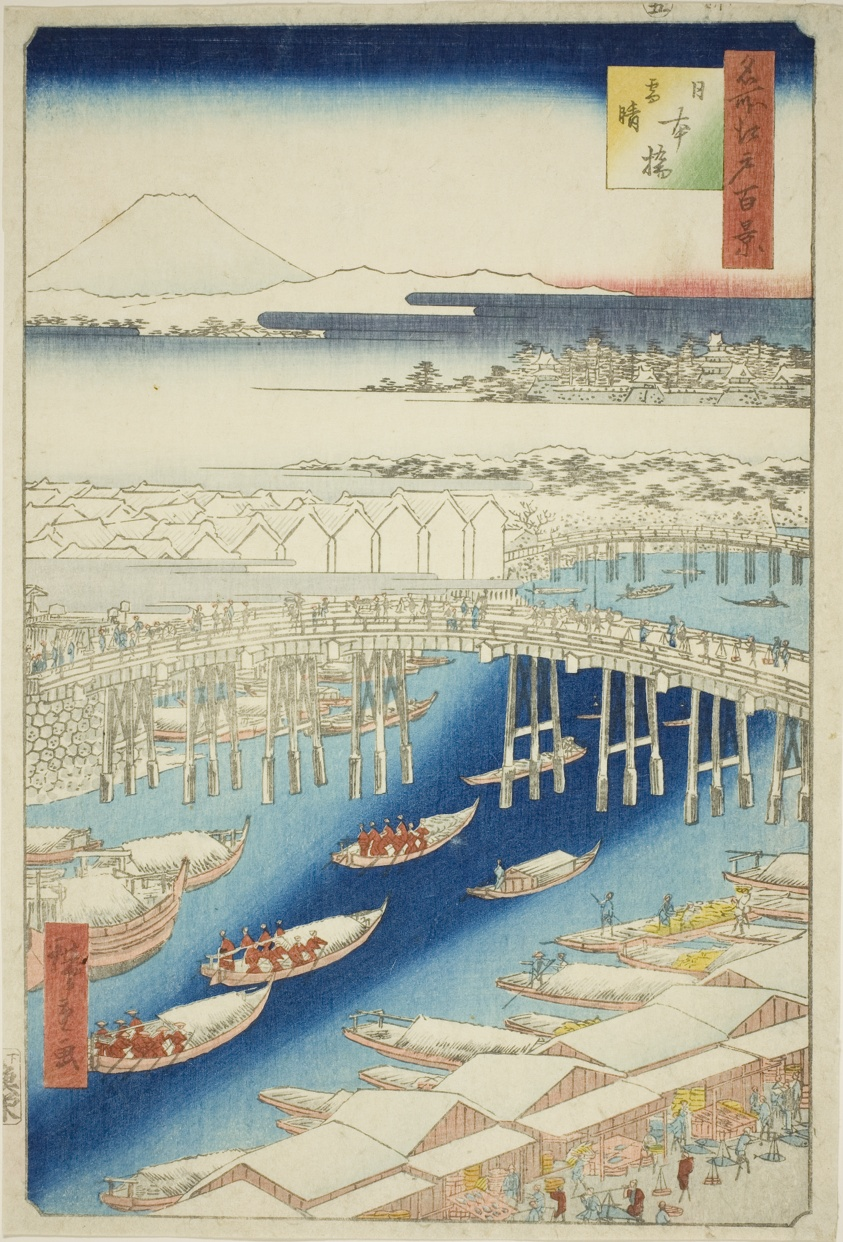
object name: Print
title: Clear Weather After Snow at Nihon Bridge (Nihonbashi yukibare), from the series "One Hundred Famous Views of Edo (Meisho Edo hyakkei)"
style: Japanese (culture or style)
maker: Utagawa Hiroshige 歌川 広重; Japanese, 1797-1858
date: 1856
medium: Color woodblock print; oban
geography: Japan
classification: woodblock print; print; asian art